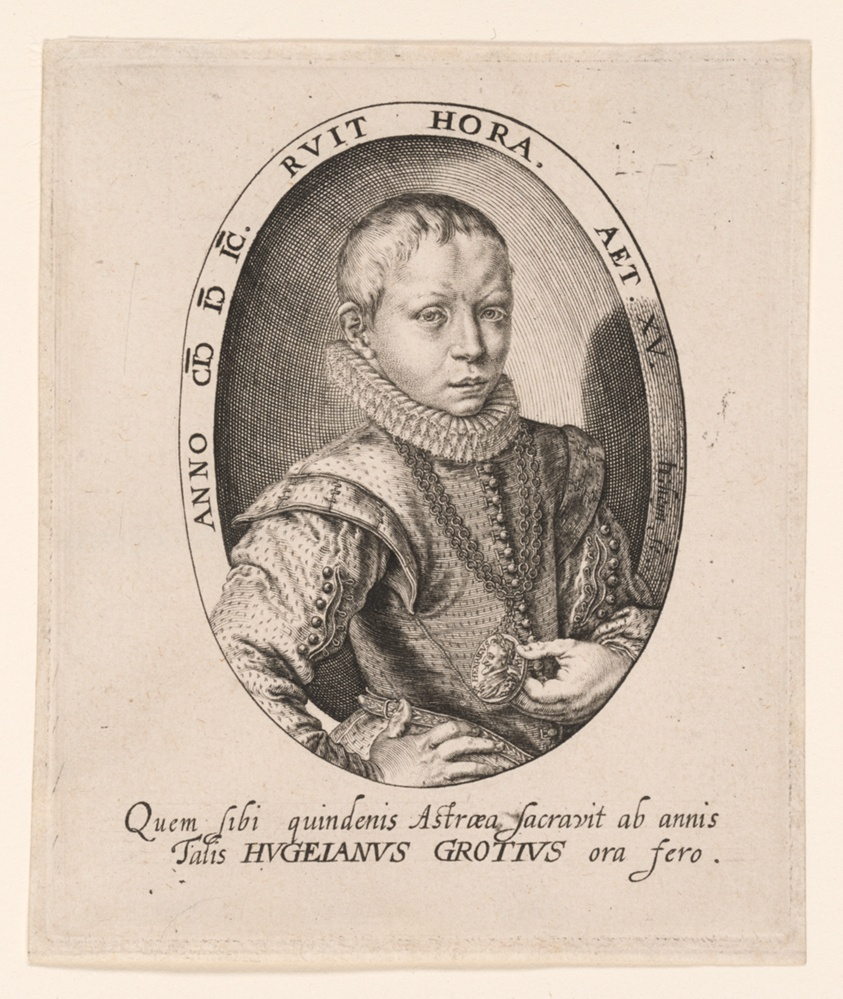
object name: Print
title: Hugo Grotius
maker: Jacques de Gheyn II; Dutch, 1565–1629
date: 1599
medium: Engraving on paper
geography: Netherlands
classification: engraving; paper; print; prints and drawing